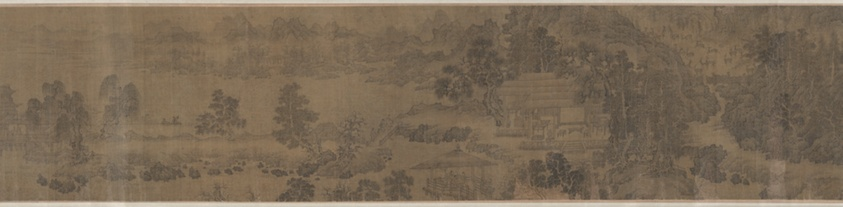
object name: Painting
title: The Wangchuan Villa 網川圖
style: Chinese (culture or style)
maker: Attributed to Li Gonglin 傳 李公麟 (Chinese, 1049–1106)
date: Jin dynasty (1115–1234), early 13th century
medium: Handscroll; ink on silk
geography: China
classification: handscroll; painting; asian art